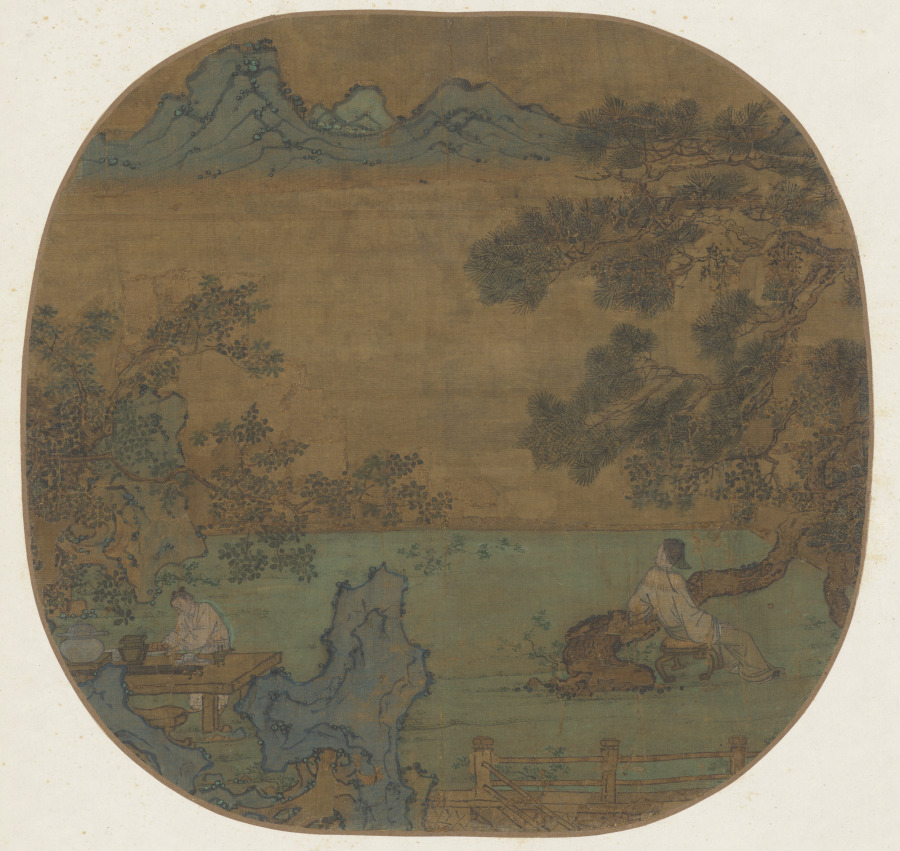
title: Landscape with Poet Tao Yuanming (365–472 CE)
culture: China, Ming dynasty (1368-1644) or earlier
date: 1200s–1400s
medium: Album leaf; ink and color on silk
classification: Painting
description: Poet Tao Yuanming (365–427 CE) turned down a civil service career in politically turbulent times to write poetry and enjoy his garden. In his poem Drinking Wine, he wrote: "I pluck chrysanthemums under the eastern fence, and serenely I gaze at the southern mountains." His desire to leave bureaucratic life for the simplicity and authenticity of nature has deeply resonated with generations of Chinese scholars, making it a popular theme in paintings.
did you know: The archaic vessels and qin, or seven-stringed zither, on the table allude to the gentleman-scholar’s cultural refinement.